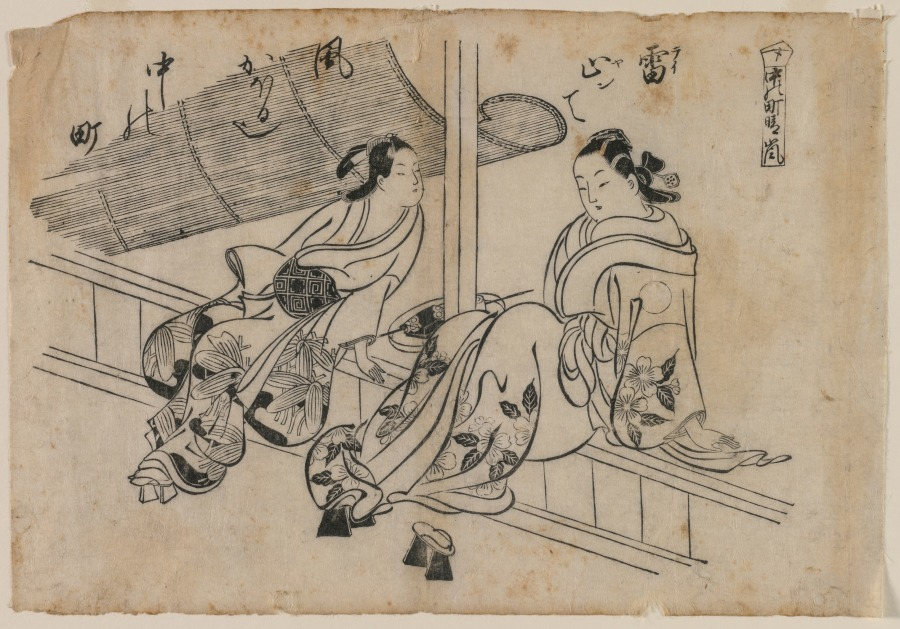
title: Twilight at Nakanocho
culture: Japan, Edo period (1615–1868)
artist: attributed to Okumura Masanobu (Japanese, 1686–1764)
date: 1686–1764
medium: color woodblock print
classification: Print